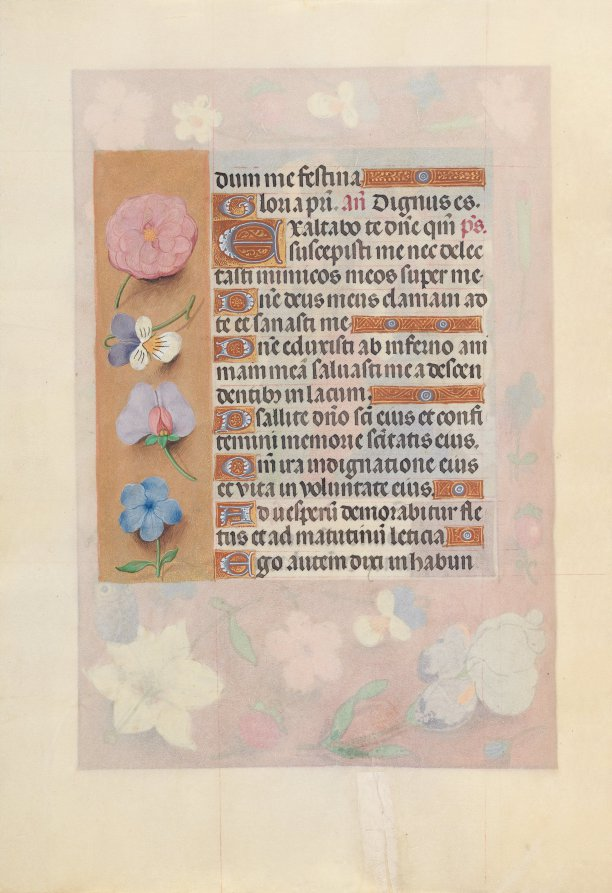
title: Hours of Queen Isabella the Catholic, Queen of Spain: Fol. 73v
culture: Flanders, Ghent and Bruges, late 15th century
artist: Master of the First Prayerbook of Maximillian (Flemish, c. 1444–1519)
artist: and Associates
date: c. 1500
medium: ink, tempera, and gold on vellum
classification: Bound Volume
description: This manuscript was illuminated by a circle of at least five highly organized manuscript painters active in the Flemish cities of Ghent and Bruges. The principal illuminator was Alexander Bening, who painted the majority of the book's miniatures. Manuscripts produced by this circle of artists are renowned for the decoration of their borders, which typically feature a rich variety of realistically-painted flowers, birds, and butterflies. This prayer book, called a book of hours, was intended not for a cleric, but for the private devotions of a lay person-in this case, Isabella the Catholic, Queen of Spain (1451-1504). Isabella's coat of arms embellishes the book's frontispiece. It is unlikely that the book was commissioned by the Queen herself; rather, she probably received it as a diplomatic gift from someone courting her patronage, perhaps Cardinal Francisco Jimenez de Cisneros. A Franciscan friar, Jimenez was dependent upon Isabella for his advancement, first to the post of Queen's confessor in 1492, and then to Archbishop of Toledo in 1495.